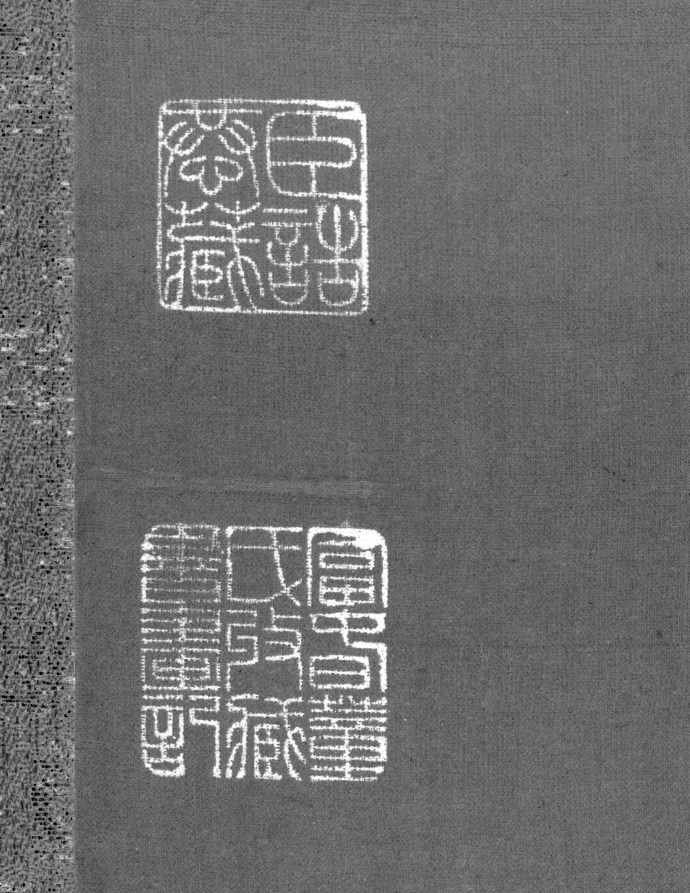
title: A Prunus in the Moonlight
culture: China, Yuan dynasty (1271-1368)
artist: Wang Mian (Chinese, 1287–1359)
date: 1300s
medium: Hanging scroll; ink on silk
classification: Painting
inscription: 8 additional seals: 6 of the Qianlong 乾隆 emperor (r. 1736-95); 2 of Dong Gao 董誥 (1740-1818).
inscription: 海雲初破月團團，獨鶴高飛夜未殘。/ 一片笙簫湖水上，玉妃含笑倚闌干。 王元章作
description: The plum flourishes in the mild climate of the south, and it was not before the Six Dynasties period (220– 589 CE) that the motif began to be appreciated by southern artists, many of whom had emigrated from the north. Wang Mian from Zhejiang province had failed the civil and military service examinations and later rejected appointments under the Mongol government. Instead, he chose to return home, making a living by selling plum paintings. Few of Wang’s works have survived, but they demonstrate that by his time the ink-plum (momei) genre was fully developed.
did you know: The painting portrays the plum in the nighttime, as indicated by the tint of the background and the presence of the moon.